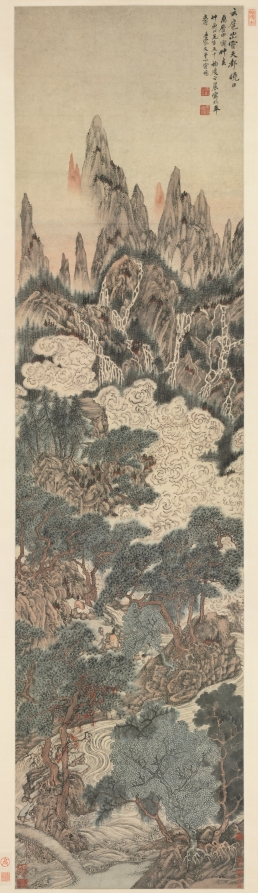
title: Morning Sun over Heavenly Citadel Peak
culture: China, Ming dynasty (1368–1644)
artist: Ding Yunpeng (Chinese, 1547-c. 1628)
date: 1614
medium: Hanging scroll; ink and light color on paper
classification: Painting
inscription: Artist's inscription, signature, and 2 seals: Clouds arise from the dale of the "Dark Plateau," The morning sun is over the peak of the Heavenly Citadel. In mid-spring of the chia-yen year of the Wan-li era [1614], painted as a fiftieth birthday present to Mr. Chung-lu. Junior Friend of Family Alliance, Ting Yün-p'eng [seals] Yün-p'eng chih yin; Ting Nan-yü.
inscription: 10 additional seals: 5 of Kao Hsiang-ling (dates unknown); 5 unidentified.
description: A birthday gift, this scroll by Ding Yunpeng from Anhui is among the earliest paintings of Mount Huang (Yellow Mountains), here depicting Heavenly Citadel Peak. The mountains are named after the legendary Yellow emperor who is said to have visited the place to look for the essence of immortality. Deep red strokes accentuate vegetation and allude to cinnabar, the alleged elixir of immortality. Difficult to climb and access, Mount Huang in Anhui province did not become a destination for hikers nor a subject for artists before the late Ming dynasty, when steps were built. Today its towering peaks are a national site and tourist attraction.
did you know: Mount Huang, known for its scenic beauty, is one of China's major tourist attractions.